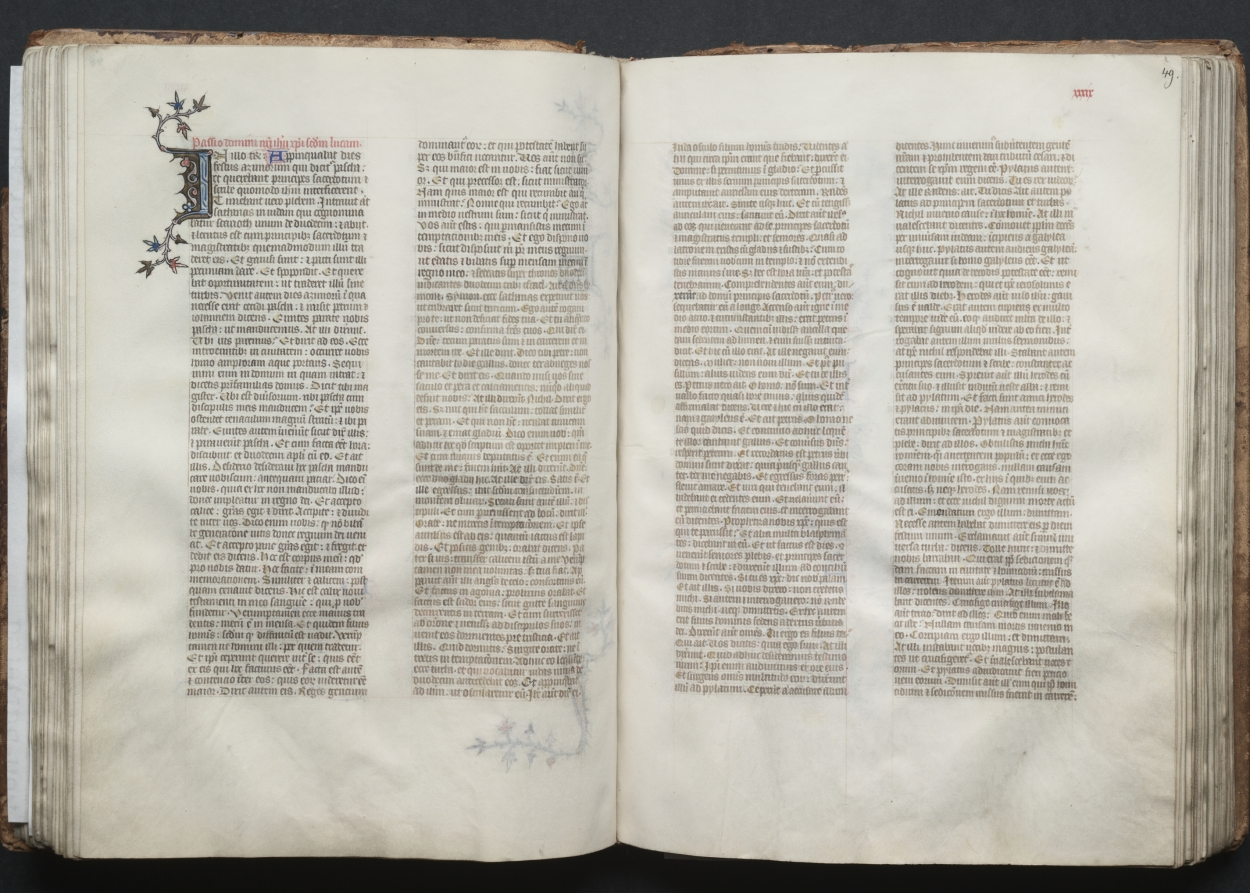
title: The Gotha Missal: Fol. 49r, Text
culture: France, Paris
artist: Master of the Boqueteaux (French)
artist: and Workshop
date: c. 1375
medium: ink, tempera, and gold on vellum; blind-tooled leather binding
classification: Bound Volume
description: The style and quality of this manuscript's decoration is typical of deluxe Parisian books made for aristocratic or royal patrons. Most of the book's decoration appears to be the work of the Master of the Boqueteaux, an artist active at the court of King Charles V (died 1380). His style was apparently shared by a number of book illuminators working in and around Paris. It is very possible that the Gotha Missal belonged to Charles V, but is not provable because the manuscript has no royal portraits and lacks a colophon. Given the book's magnificent decoration, however, it would seem that it was produced for a Valois prince, if not for the king himself. The manuscript receives its name from the German dukes of Gotha, its later owners.